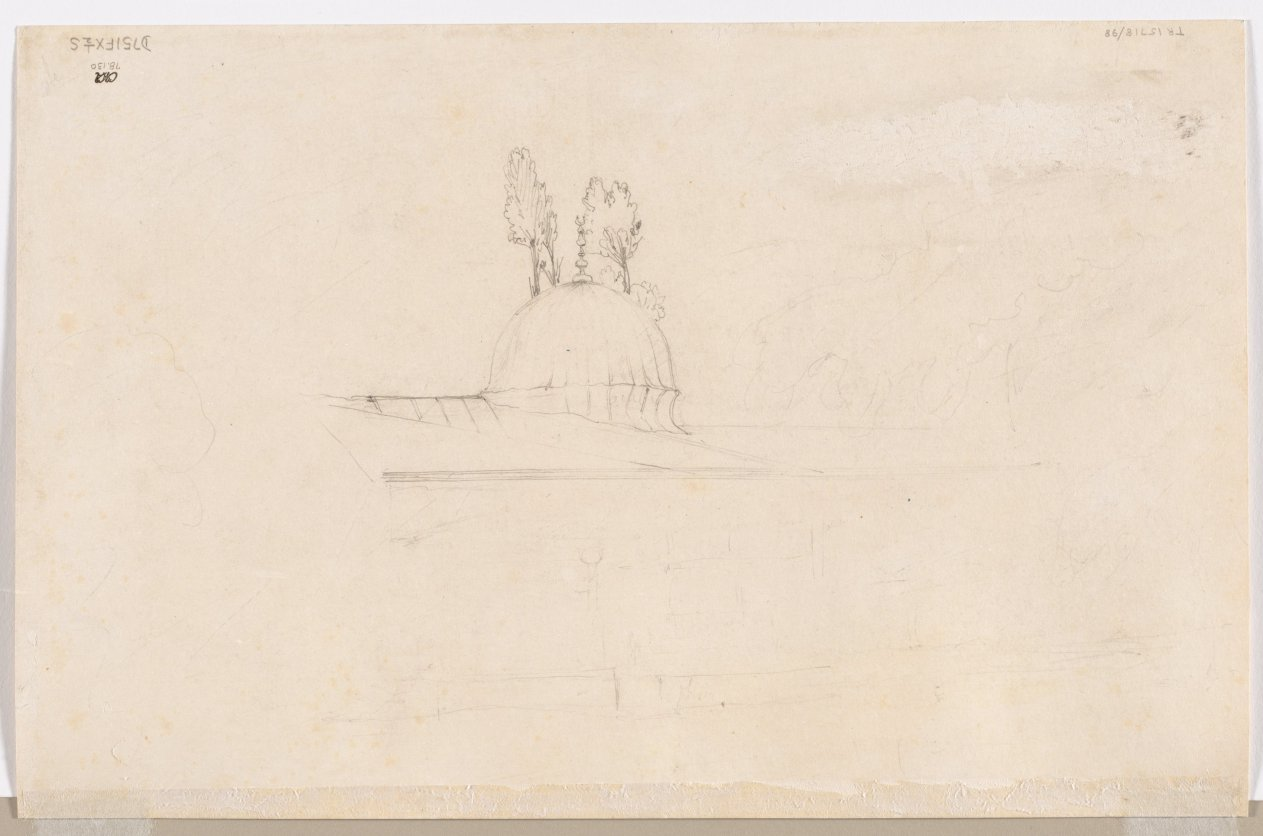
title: Sketch for Pavilion Near a Mosque (verso)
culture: France, 19th century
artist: Félix Ziem (French, 1821–1911)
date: 1800s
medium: graphite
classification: Drawing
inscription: upper left, in graphite: D751FX1/2S [upside down]